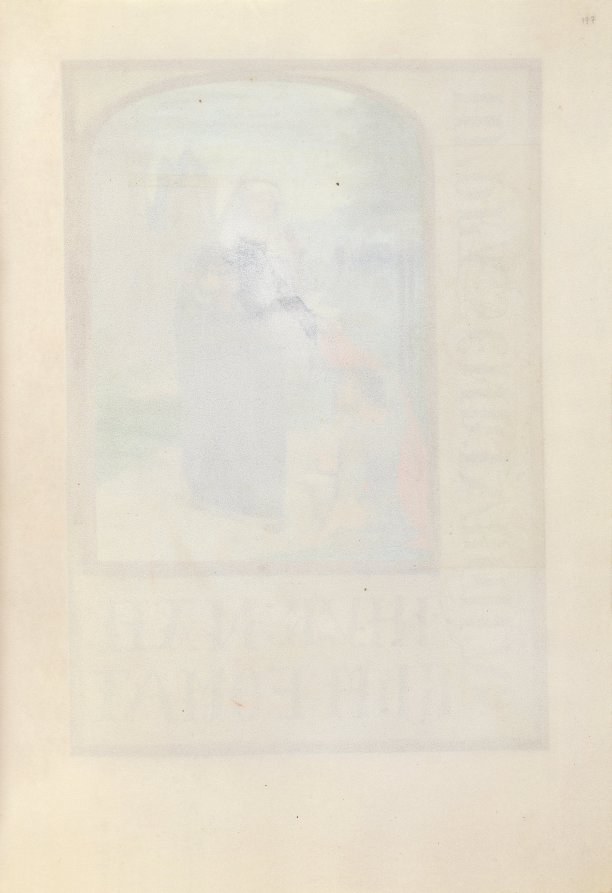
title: Hours of Queen Isabella the Catholic, Queen of Spain: Fol. 197r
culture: Flanders, Ghent and Bruges, late 15th century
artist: Master of the First Prayerbook of Maximillian (Flemish, c. 1444–1519)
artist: and Associates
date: c. 1500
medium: ink, tempera, and gold on vellum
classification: Bound Volume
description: This manuscript was illuminated by a circle of at least five highly organized manuscript painters active in the Flemish cities of Ghent and Bruges. The principal illuminator was Alexander Bening, who painted the majority of the book's miniatures. Manuscripts produced by this circle of artists are renowned for the decoration of their borders, which typically feature a rich variety of realistically-painted flowers, birds, and butterflies. This prayer book, called a book of hours, was intended not for a cleric, but for the private devotions of a lay person-in this case, Isabella the Catholic, Queen of Spain (1451-1504). Isabella's coat of arms embellishes the book's frontispiece. It is unlikely that the book was commissioned by the Queen herself; rather, she probably received it as a diplomatic gift from someone courting her patronage, perhaps Cardinal Francisco Jimenez de Cisneros. A Franciscan friar, Jimenez was dependent upon Isabella for his advancement, first to the post of Queen's confessor in 1492, and then to Archbishop of Toledo in 1495.